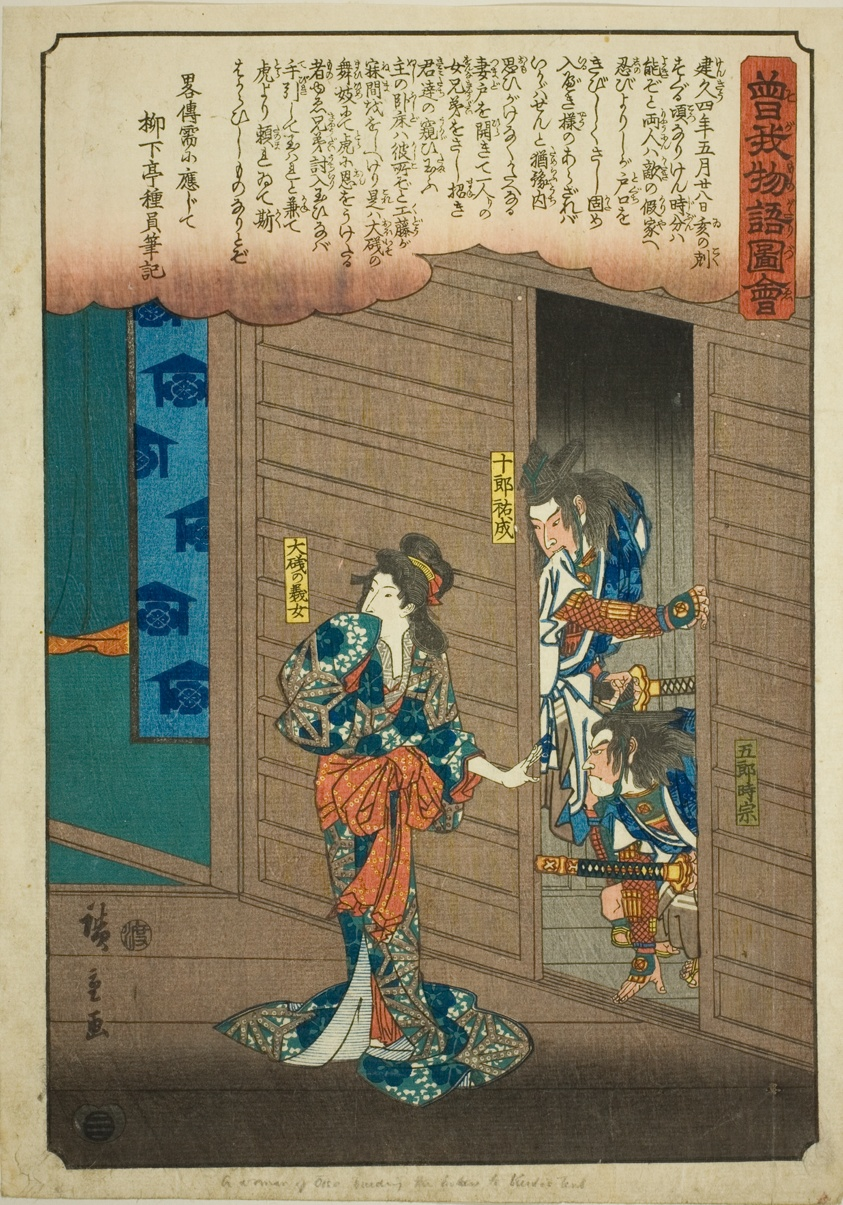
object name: Print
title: Oiso no Tora telling Soga Brothers where to find Suketsune, from the series "Illustrated Tale of the Soga Brothers (Soga monogatari zue)"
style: Japanese (culture or style)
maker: Utagawa Hiroshige 歌川 広重; Japanese, 1797-1858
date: c. 1843/47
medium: Color woodblock print; oban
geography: Japan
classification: woodblock print; print; asian art